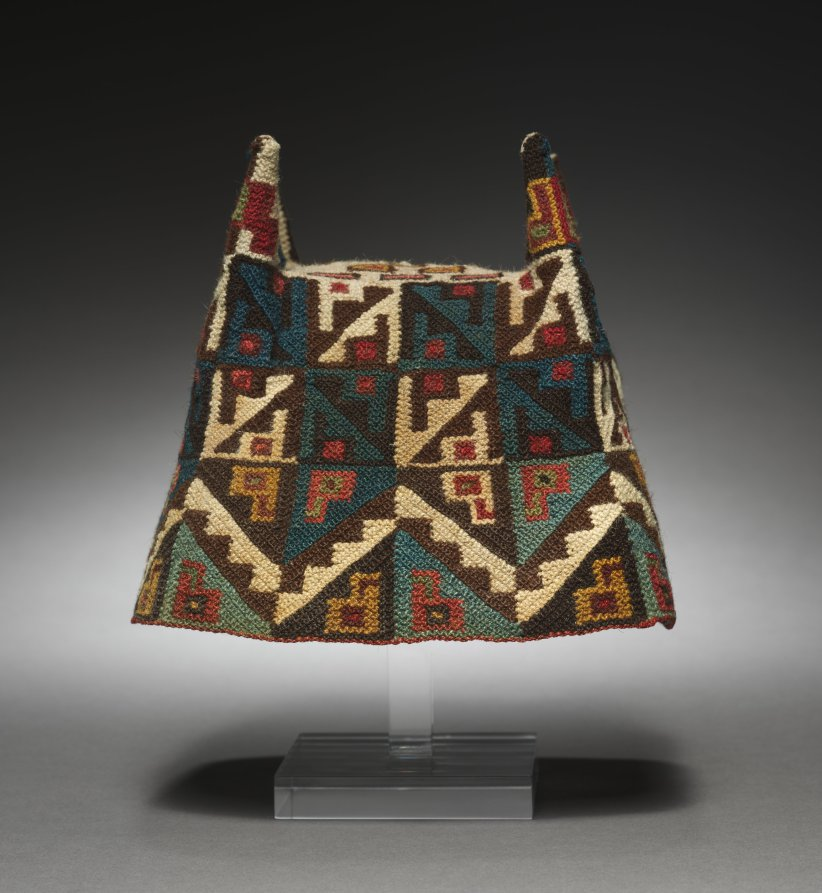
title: Four-Cornered Hat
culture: Peru, South Andes or Chile, Northern Andes, Tiwanaku style, 5th-10th Century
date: c. 400–1000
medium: alpaca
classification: Textile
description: A distinctive type of Tiwanaku and Wari headgear was a hat with four ear-like peaks rising from the corners. Depicted on warriors and other men who wear prestigious clothing and ornaments, the hats were made with knots, visible on all sides of this handsome Tiwanaku example. The hat is decorated with a pattern that includes a profile bird head.